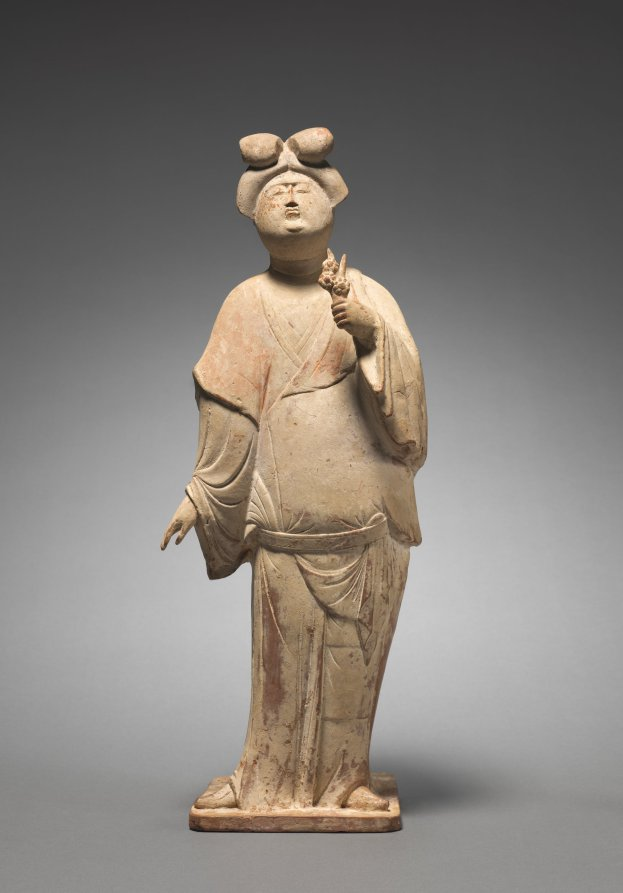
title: Woman Holding Plum Blossoms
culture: North China, Tang dynasty (618-907)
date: mid-700s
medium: earthenware covered in white slip with traces of pigment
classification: Sculpture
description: Tang figurines placed in the tombs give a vivid picture of everyday life. Images of elegant ladies in various hairstyles, costumes, and activities suggest the fashion of the time. This example of a plump and flamboyant lady is a common type found in mid-8th-century tombs, especially in the cosmopolitan city of Xi'an. Together with other figurines—court officials, musicians, dancers, hunters, foreign travelers, horses, camels, guardian warriors, and guardian animals—such tomb sculptures accompanied the deceased in the afterlife.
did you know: Tang aristocratic women had a high degree of freedom, especially in contrast with the Neo-Confucianism of the later Song dynasty.